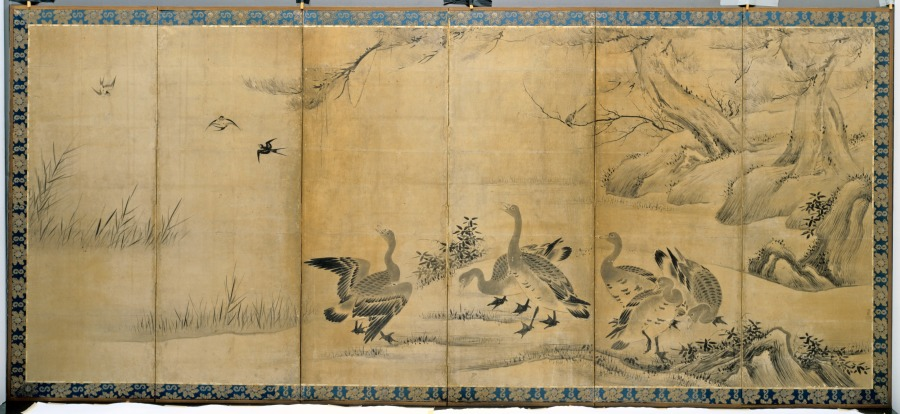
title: Wild Geese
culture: Japan, Edo period (1615–1868)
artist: Kano Sanraku (Japanese, 1559–1635)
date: late 1500s-early 1600s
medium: pair of six-fold screens; ink on paper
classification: Painting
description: Depictions of geese usually appear as ink paintings in Japan during the 1200s. They later show up in the colorful landscapes of illustrated handscrolls. Such early ink renditions of the birds have long been associated with classical Chinese Zen painting and poetry, which was avidly admired and collected in medieval Japan. In these screens the artist portrayed the waterfowl in a pastoral setting without reference to classical or religious themes. Such ordinary subjects were imbued with special meaning in 14th- and 15th-century Japan through associations with continental culture, Zen thought and poetry, and famous Chinese monk-painters whose painting techniques had become revered as visual emblems of Zen principles. The screens here reflect the continuation of that painting tradition in the late 1500s or early 1600s by the head of the most important studio in Kyoto. Sanraku also executed a number of colorful folding screen compositions, but here he pays homage to the style of early Zen painting.